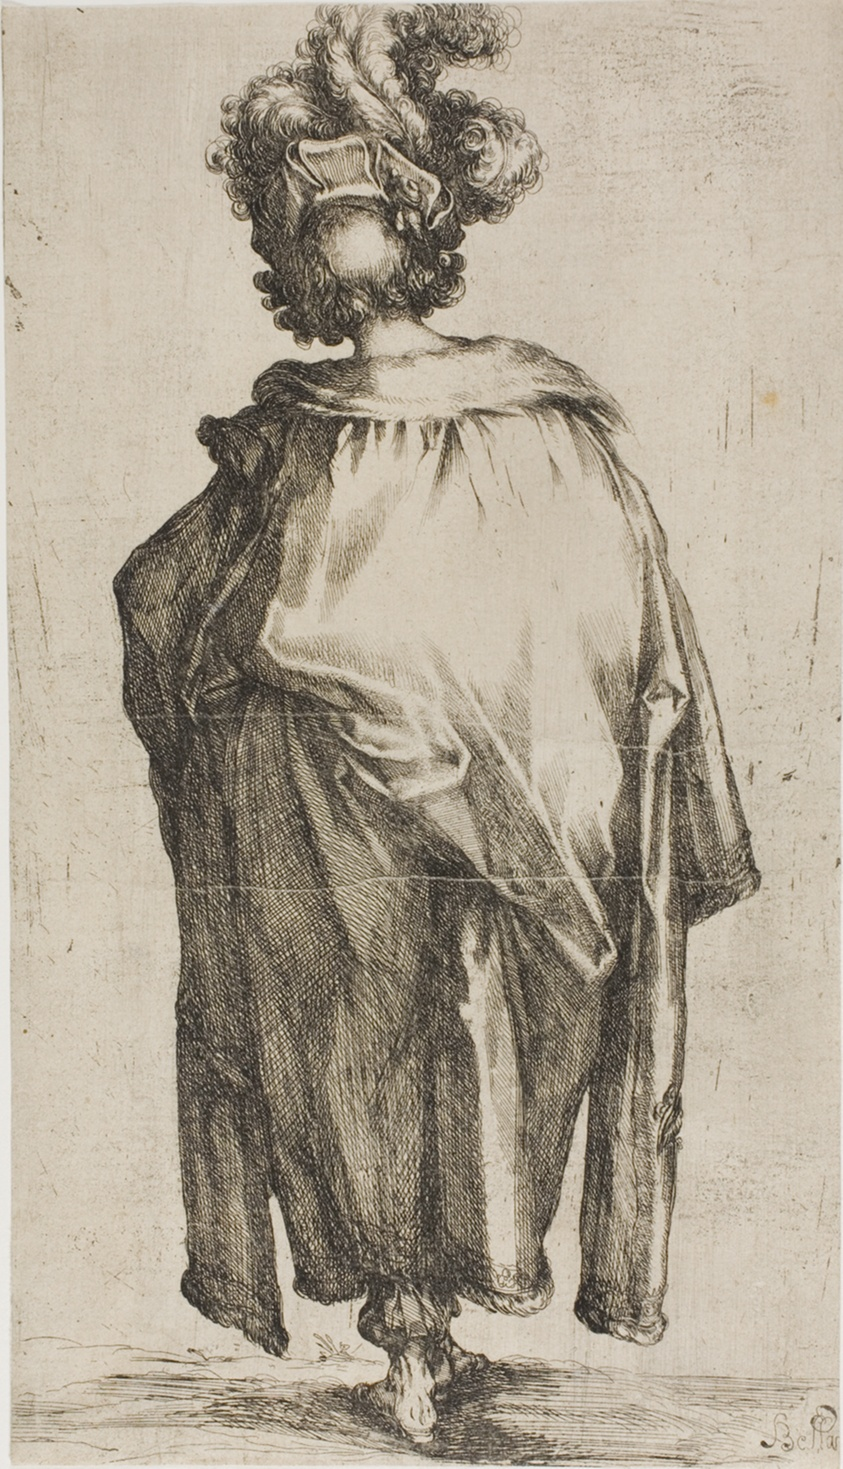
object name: Print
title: Melchior, from the Three Magi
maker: Jacques Bellange (French, c. 1575-1616)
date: c. 1612-1616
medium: Etching on ivory laid paper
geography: France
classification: etching; print; prints and drawing